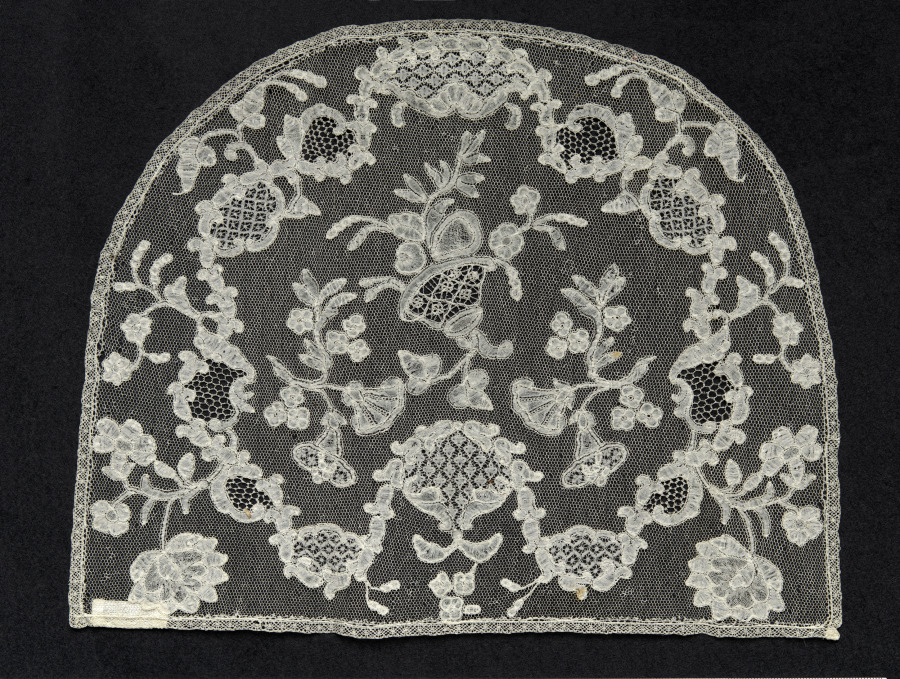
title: Lace Cap Crown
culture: Belgium, Brussels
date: 1700–1750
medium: Bobbin lace (Point d'Angleterre)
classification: Lace